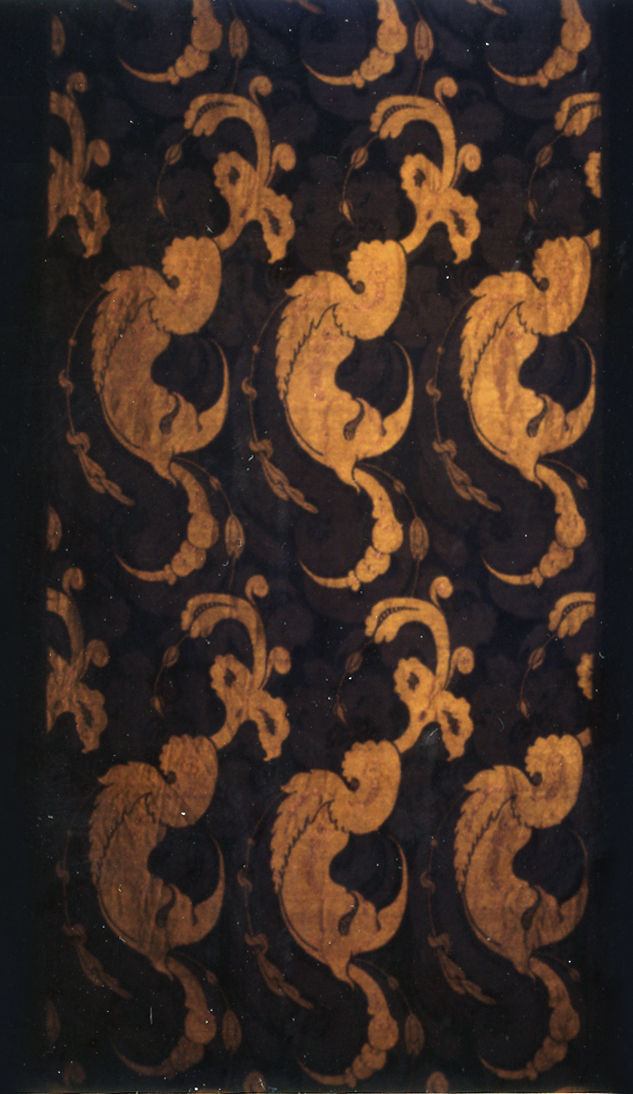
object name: Textile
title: Panel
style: Art Nouveau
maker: Produced by F. Schumacher & Company, founded 1889; United States, New York, New York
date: 1900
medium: Silk and gilt metal wrapped silk, satin weave with supplementary brocading wefts bound in twill interlacing and self-patterned by reversing of faces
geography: New York City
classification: textile; weaving